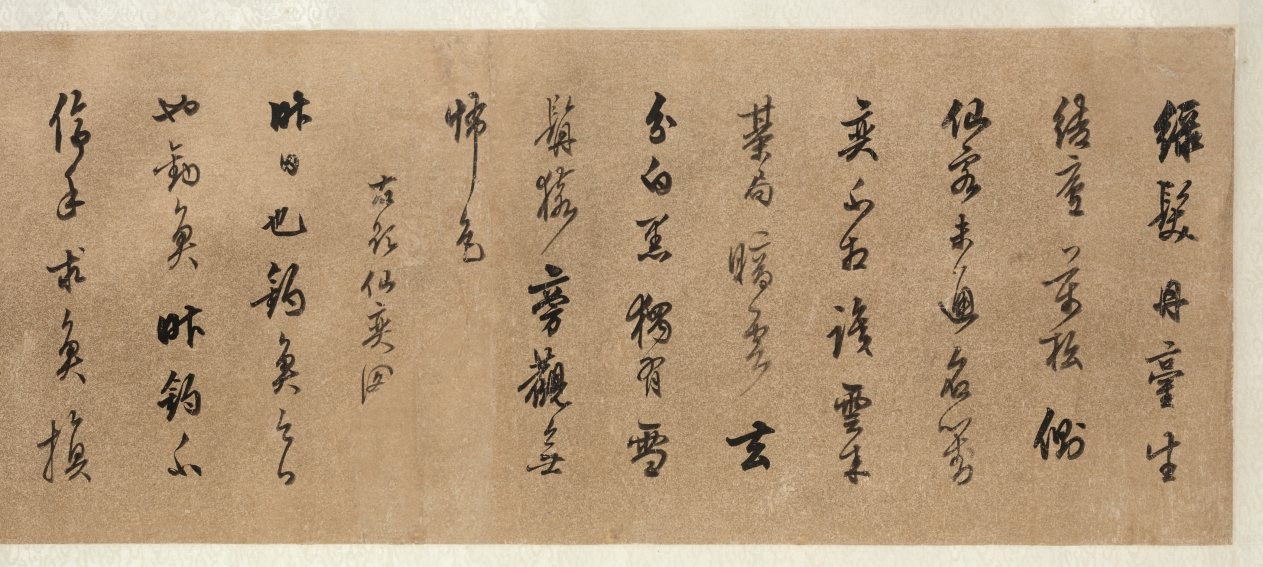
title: Four Poems: Calligraphy in Cursive Script (xingshu)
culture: China, Ming dynasty (1368–1644)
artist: Chen Jiru (Chinese, 1558–1639)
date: 1500s-1600s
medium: handscroll; ink on gold speckled paper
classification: Calligraphy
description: Written in graceful calligraphy with well-composed characters, the artist communicates his thoughts and state of mind in four poems. Characters written in dark, thick strokes convey rhythm, and indicate the moment after the writer had paused to recharge his brush with ink. Chen Jiru was a native of Huating (modern Shanghai). His calligraphy style resembles that of his friend, influential calligrapher Dong Qichang (1555–1636). Unlike Dong, Chen did not pursue government service: he burned his Confucian robes, declined a summons to serve at court, and immersed himself in literature, calligraphy, and painting.